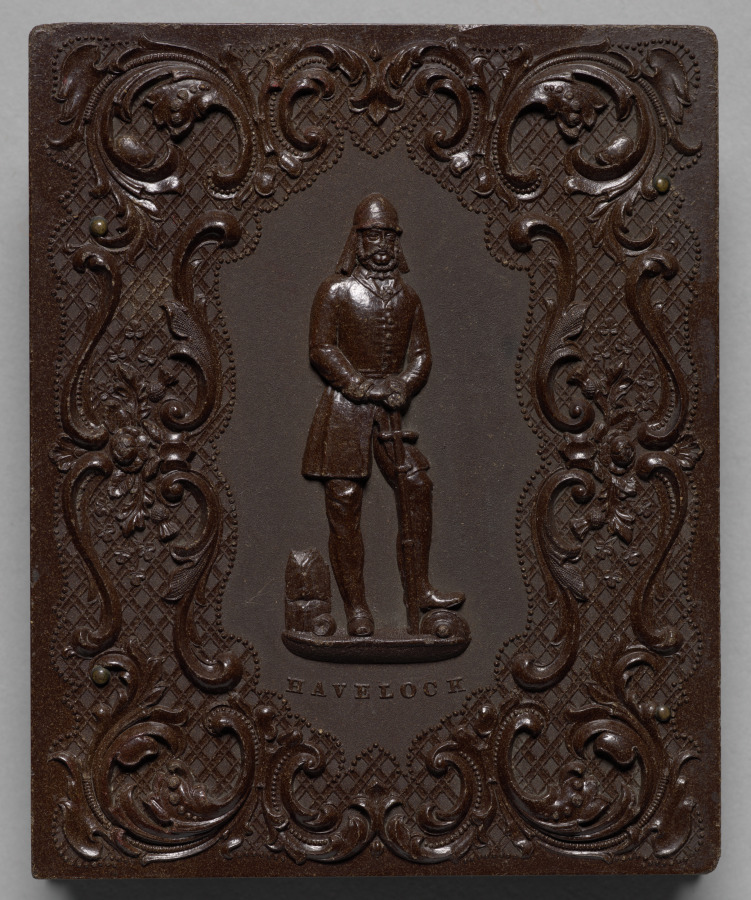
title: The Homework Table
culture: America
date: c. 1858–60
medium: daguerreotype, quarter plate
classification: Photograph